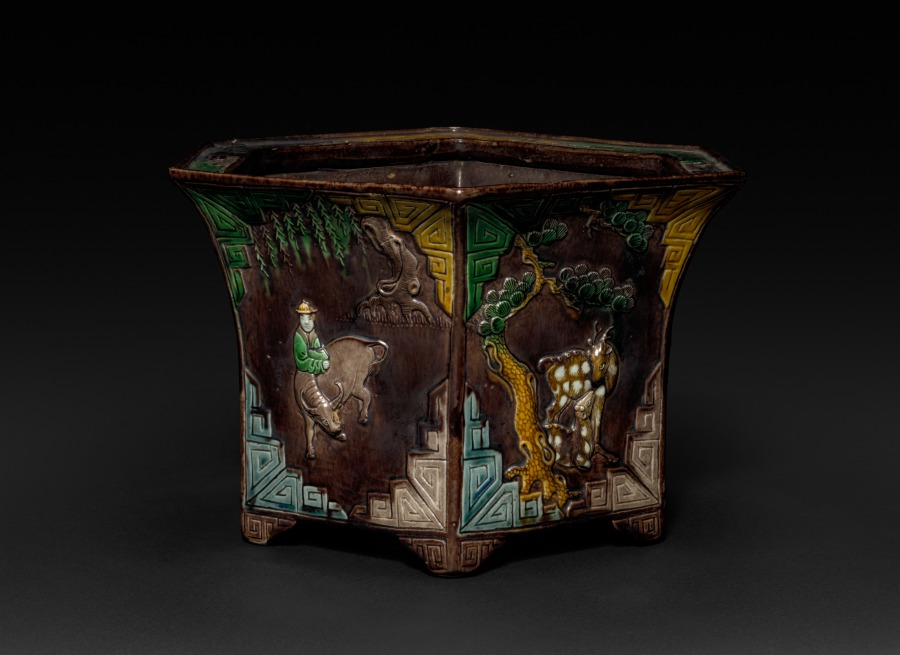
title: Cachepot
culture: China, Qing dynasty (1644-1911), Kangxi reign (1661-1722)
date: 1662–1722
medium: porcelain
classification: Ceramic